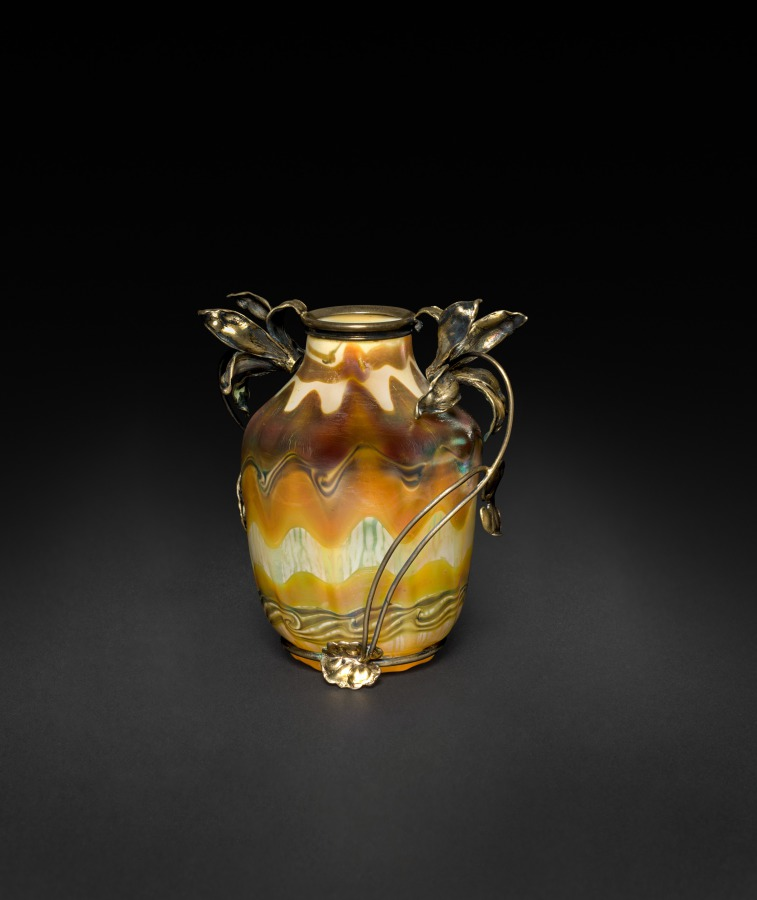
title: Vase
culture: America, New York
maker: Tiffany Glass & Decorating Company (America, New York, 1892–1902)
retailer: Siegfried Bing (German, active in France, 1838–1905)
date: c. 1900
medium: Favrile glass, silver mount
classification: Glass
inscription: Louis C. Tiffany o10301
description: This small vase is made of Louis Comfort Tiffany's signature Favrile glass. Early on when Tiffany began collaborating with glass artists on new types of production, his aesthetic ambitions were realized in the development of Favrile glass, deliberately named to sound French, expensive, and “handmade.” Largely through Tiffany's marketing ability, Favrile glass became America’s greatest contribution to the Art Nouveau style. His works were exhibited at international expositions; galleries in major European cities, where his creations were bought by many museums; and in his store in Manhattan, known as the Tiffany Glass and Decorating Co., later Tiffany Studios. Along with the many shapes and sizes of his decorative vases, Tiffany used Favrile glass in mosaic panels, stained glass windows, and his artistic line of table and floor lamps.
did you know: This vase has French mounts indicating that it was likely sold by Louis Comfort Tiffany's agent in Paris, Siegfried Bing, who helped popularize Tiffany's designs throughout Europe.